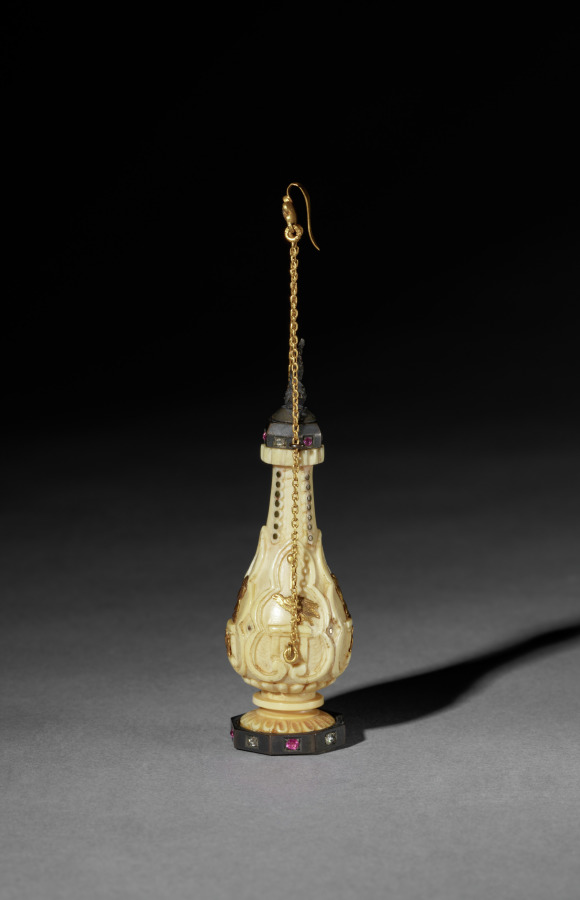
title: Scent Bottle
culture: Continental, mid-19th century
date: mid-1800s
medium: ivory with gold and silver mounts set with jewels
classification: Miscellaneous